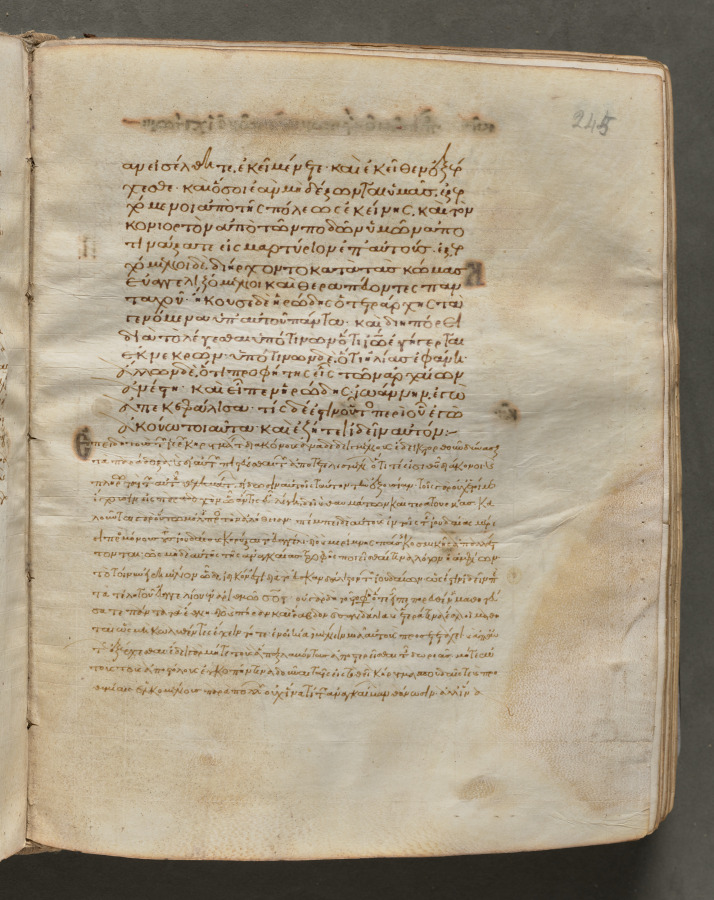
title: Text, folio 245 (recto), from a Gospel Book with Commentaries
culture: Byzantium, Constantinople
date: c. 1000–1100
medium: ink, tempera, and gold on vellum; leather binding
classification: Bound Volume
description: Each of the four gospels in this book opens on a page with brilliantly illuminated borders depicting the author of the text as well as birds—principally peacocks, symbols of the immortality of the soul—and fountains, representing the fountain of life and the salvation of the soul. This volume consists of 428 leaves with texts in Greek. Its level of sophistication suggests that it was probably written and decorated in a monastery in Constantinople.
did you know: Gospel books were carried in procession through Byzantine churches.